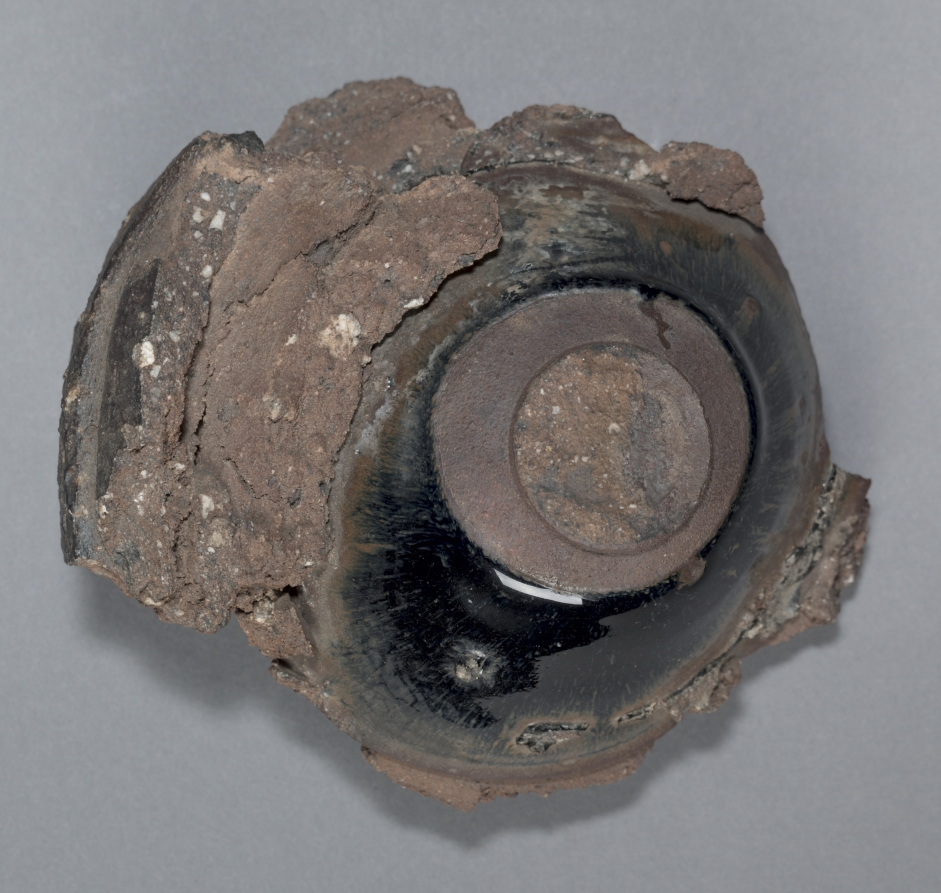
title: Saggers and Bowl Fragments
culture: China, near Shui ch'i, Song dynasty (960-1279)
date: 960–1279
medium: stoneware with "hare's fur" glaze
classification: Ceramic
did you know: A sagger is a ceramic box-like container used to protect pottery while being fired inside a kiln.